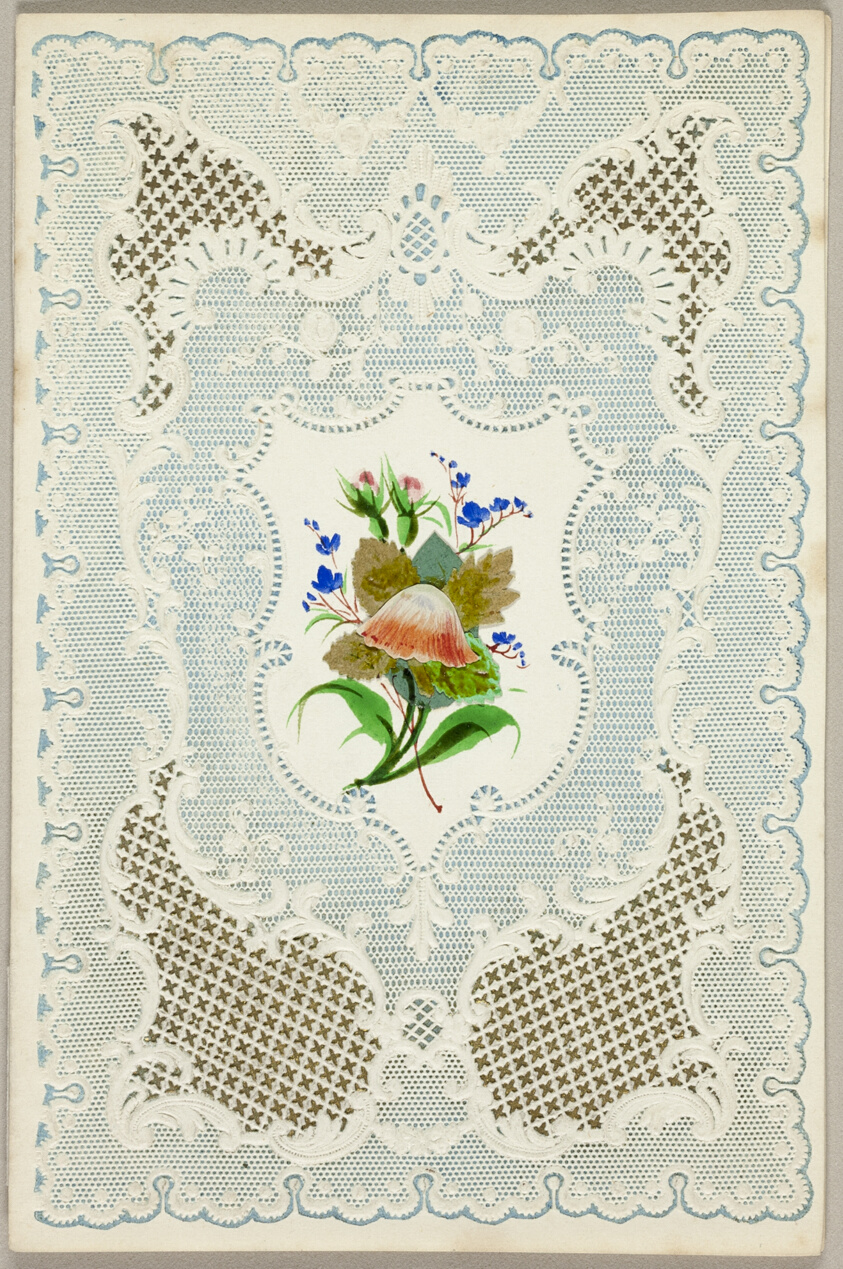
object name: Drawing and Watercolor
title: Untitled Valentine (Flowers)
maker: Unknown Artist; English, 19th century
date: 1840/50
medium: Collaged elements and watercolor on blue accented and embossed ivory wove paper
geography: England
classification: valentine; prints and drawing; paper